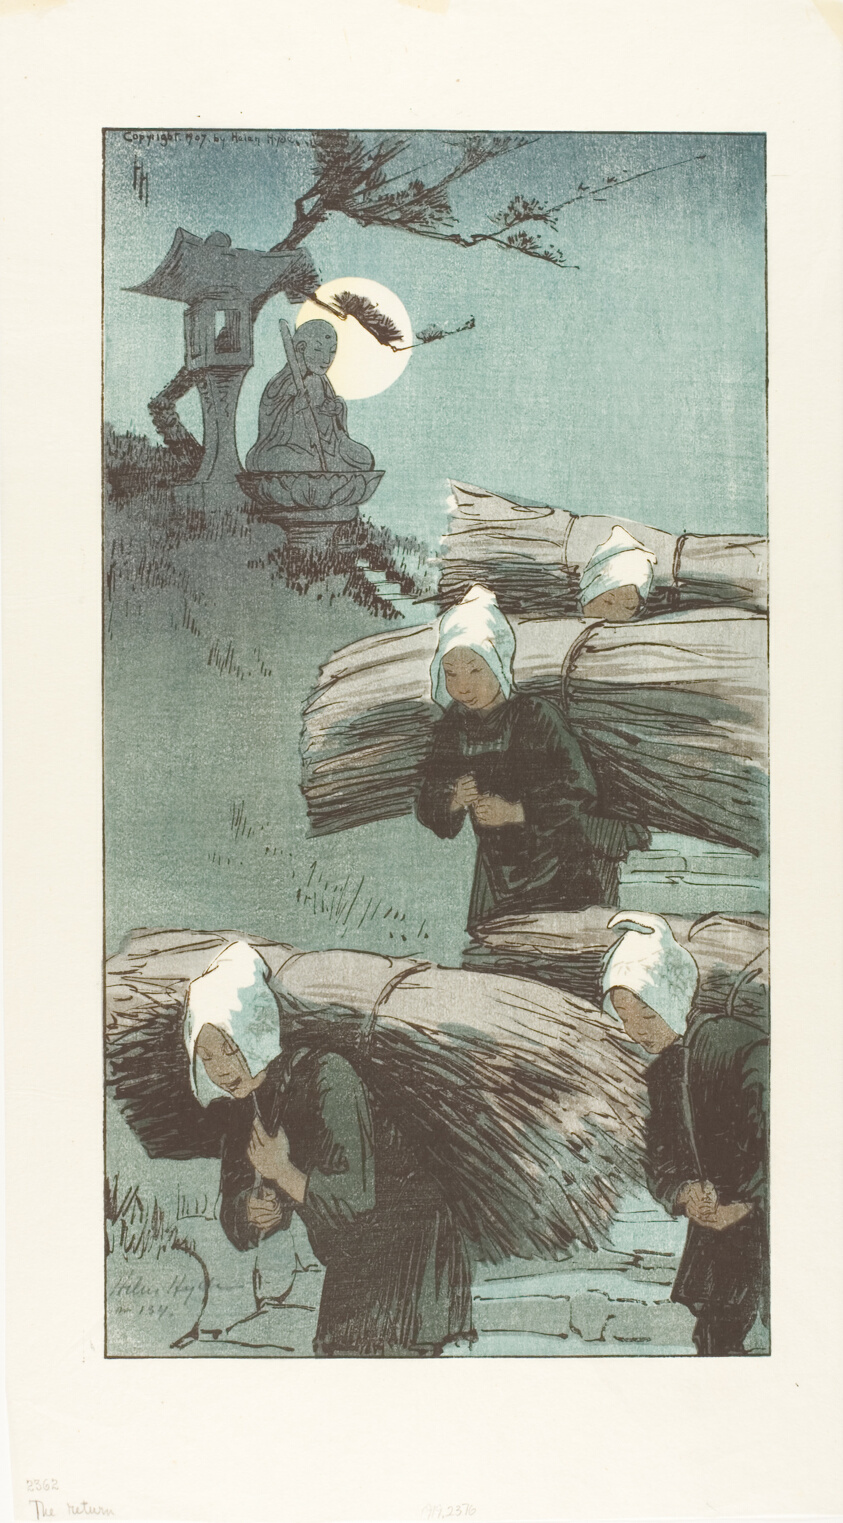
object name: Print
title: The Return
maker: Helen Hyde (American, 1868-1919)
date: 1907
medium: Color woodcut on paper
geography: United States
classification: woodcut; print; prints and drawing